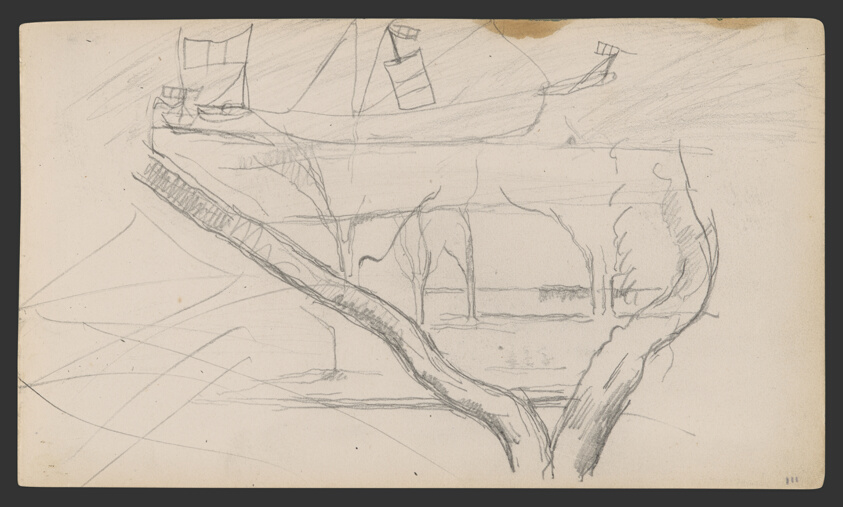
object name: Drawing and Watercolor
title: Sketchbook No. 2 (L'Estaque)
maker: Paul Cézanne; French, 1839-1906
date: 1875–86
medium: Graphite and pen and ink drawings on paper, bound into a book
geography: France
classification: sketchbook; graphite; prints and drawing; paper